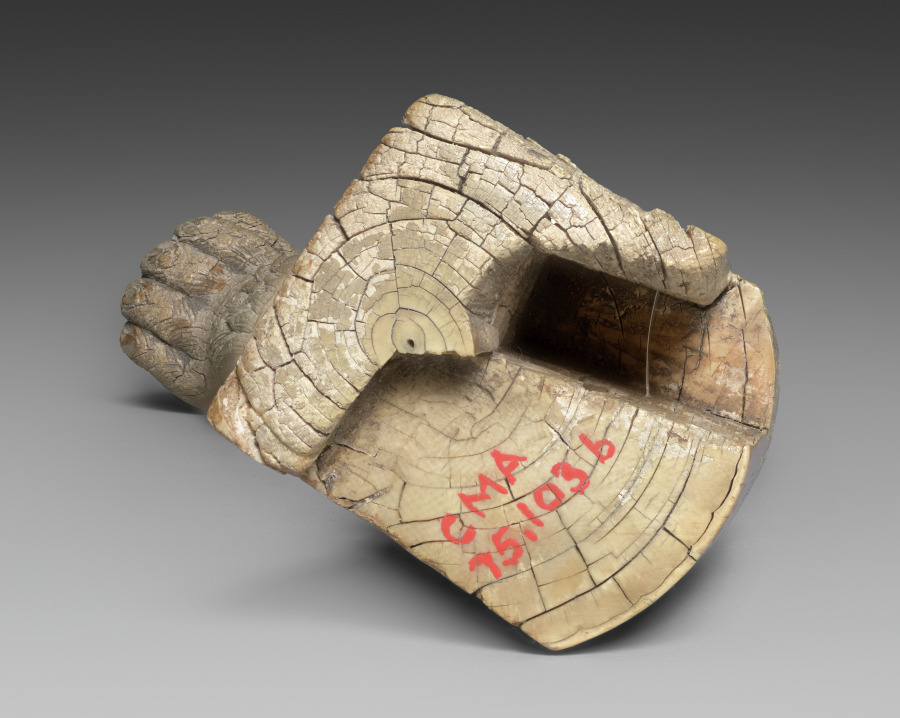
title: Chair Leg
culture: Afghanistan, Begram, Kushan period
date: 300s CE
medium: ivory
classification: Ivory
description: This ivory carving was made to sheath wooden furniture made in India for trade along the Silk Road, which stretched from Rome to China. Indian ivory-faced furnishings--along with lacquer boxes from China and painted glass from Rome--were found in an extraordinary deposit of luxury goods at a site called Begram. The wood on which the ivory and lacquer were affixed has long disintegrated, and only the small pieces remain.